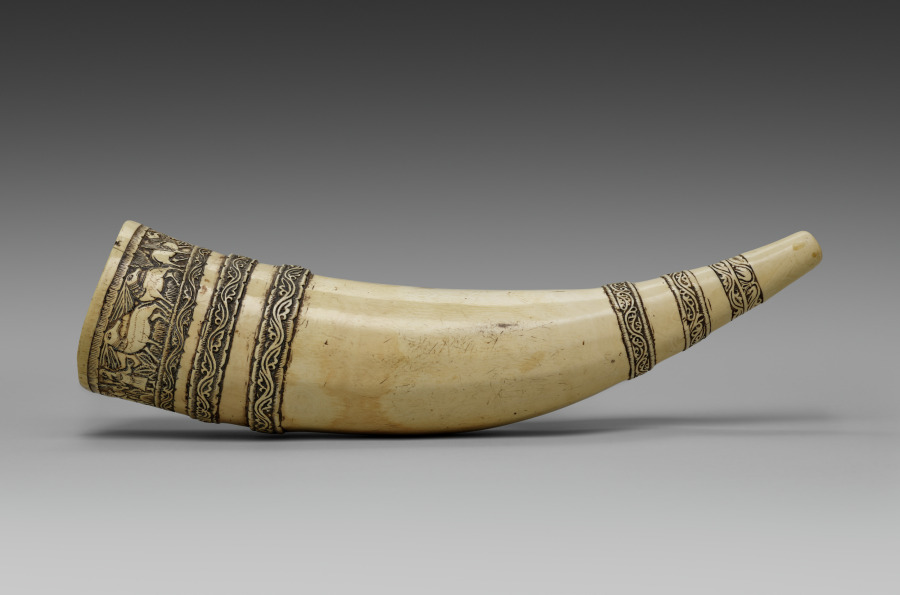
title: The So-called Horn of Saint Blaise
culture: South Italy or Sicily, 12th century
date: 1100–1200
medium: ivory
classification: Ivory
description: This oliphant--a carved elephant tusk in the shape of a hunting horn--was likely carved in an Arab ivory workshop in South Italy or Sicily. It is masterfully shaped, with a series of six carved bands, the outer ring depicting scenes from a hunt. The earliest surviving inventory of the church of Saint Blaise from 1482-85 lists an oliphant decorated with silver rings and precious stones and known as the "Horn of Saint Blaise." By the 17th century, Saint Blaise was reputed to have used this very horn to summon the faithful to worship.